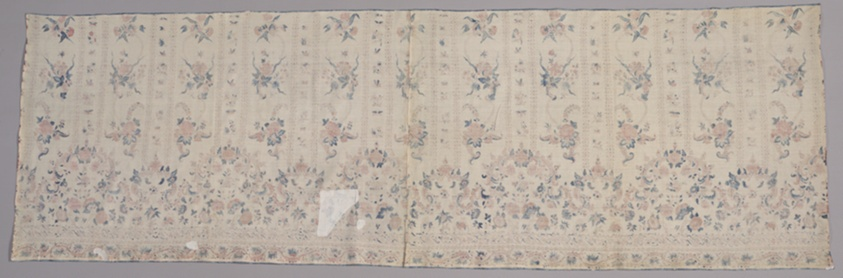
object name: Textile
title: Panel of Chintz for a Woman's Skirt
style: 18th Century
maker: Made in India possibly for the Dutch or Latin American market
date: 1730-50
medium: Cotton, plain weave; hand painted and dyed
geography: India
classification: textile; weaving - printed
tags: paisley, hunter, animals, floral, floral motifs, floral patterns, flowers, scrolls (motifs)